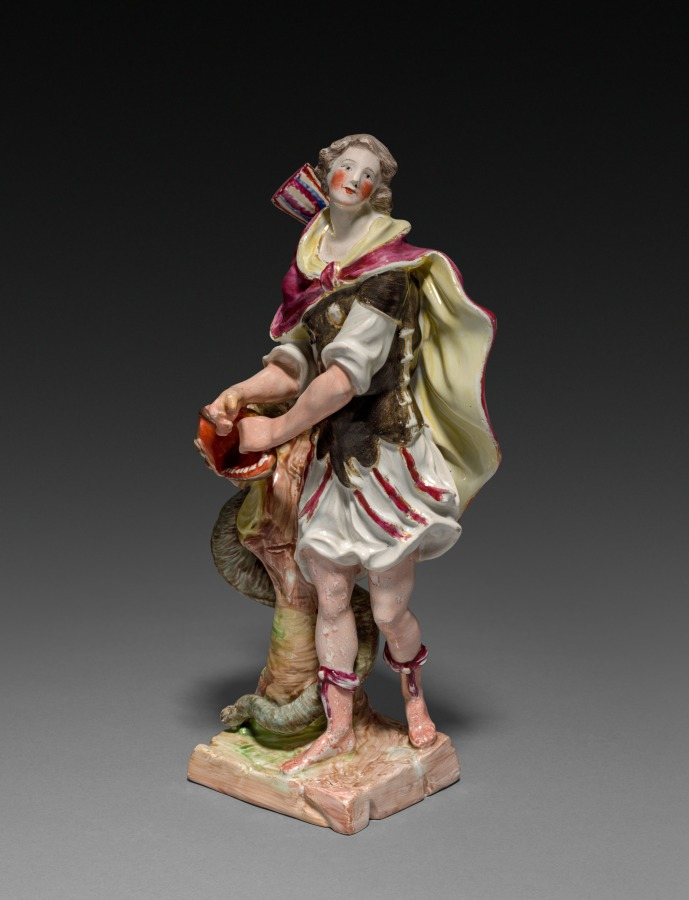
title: Classical Warrior with Serpent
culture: France, 18th century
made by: Sceaux Factory (French, active 1748–66)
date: c. 1770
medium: faience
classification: Ceramic